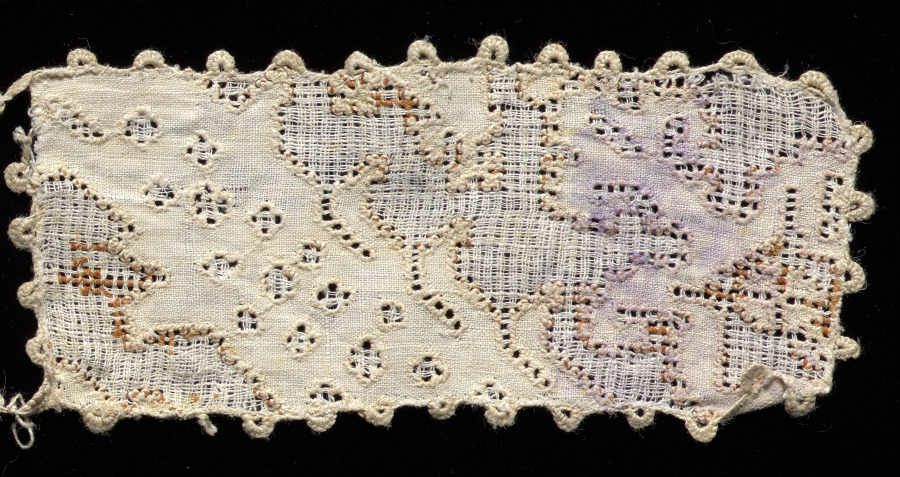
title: Lace Cuff (one of two)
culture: Italy, 1800s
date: 1800s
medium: Linen: needle lace (drawnwork)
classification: Lace